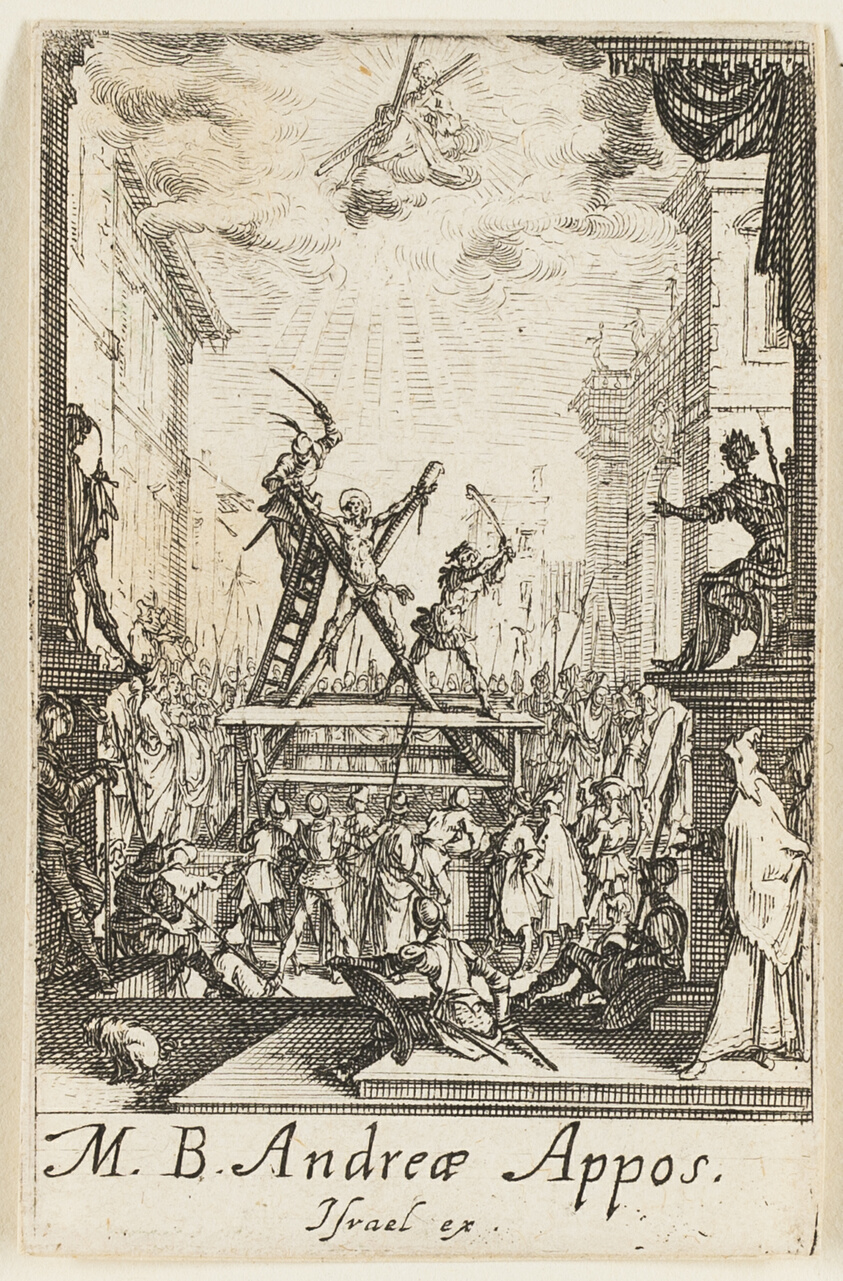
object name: Print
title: Martyrdom of Saint Andrew, plate three from The Martyrdoms of the Apostles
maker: Jacques Callot (French, 1592-1635)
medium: Etching on paper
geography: France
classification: etching; print; prints and drawing